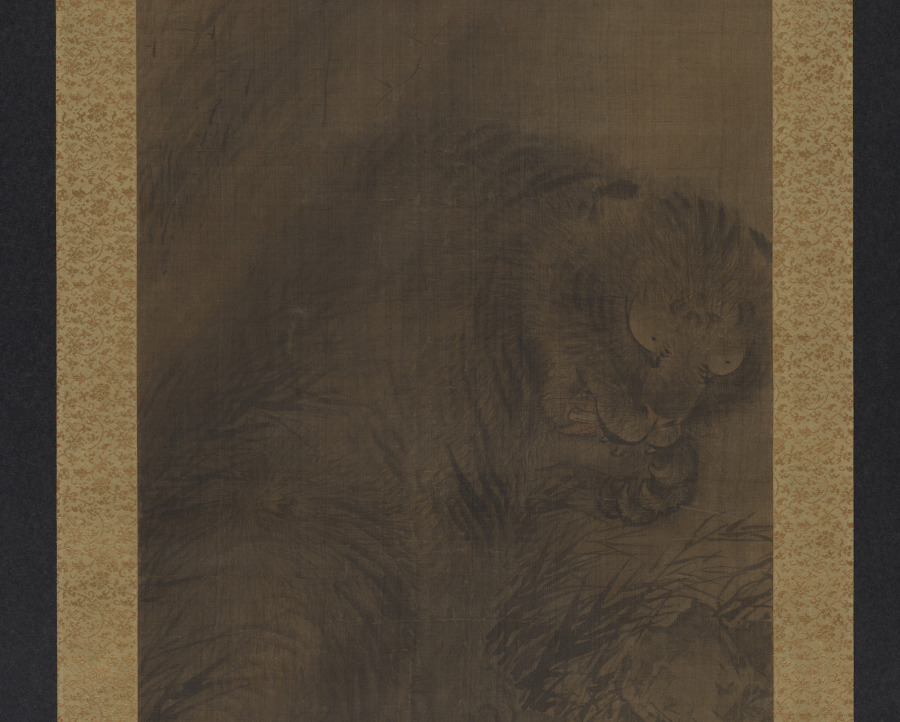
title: Tiger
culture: China, Southern Song dynasty (1127-1279)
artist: Fachang Muqi (Chinese, 1220–1280)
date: c. 1250–79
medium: Hanging scroll; ink and slight color on silk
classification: Painting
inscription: 道有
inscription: 雜華室印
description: The dragon and tiger are tied to the philosophical concept of yin and yang, which describes opposite but complementary forces. The dragon occupies a tiered background of waves and mist. Its luminous head emerges from the darker passages, and its narrow twisting body is serpent-like. By contrast, the close-up view of the tiger emphasizes its bulk. The tiger bends its head to lick its paw while its tail curls in the foreground. In their original Chan Buddhist context, this pair of scrolls likely flanked a central image, like the Bodhisattva Guanyin. The silk has darkened over the centuries, and the slight reddish shading in the tiger’s tongue and nose has faded.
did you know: Fachang Muqi's ink paintings, like this pair, were highly appreciated and collected in Japan.